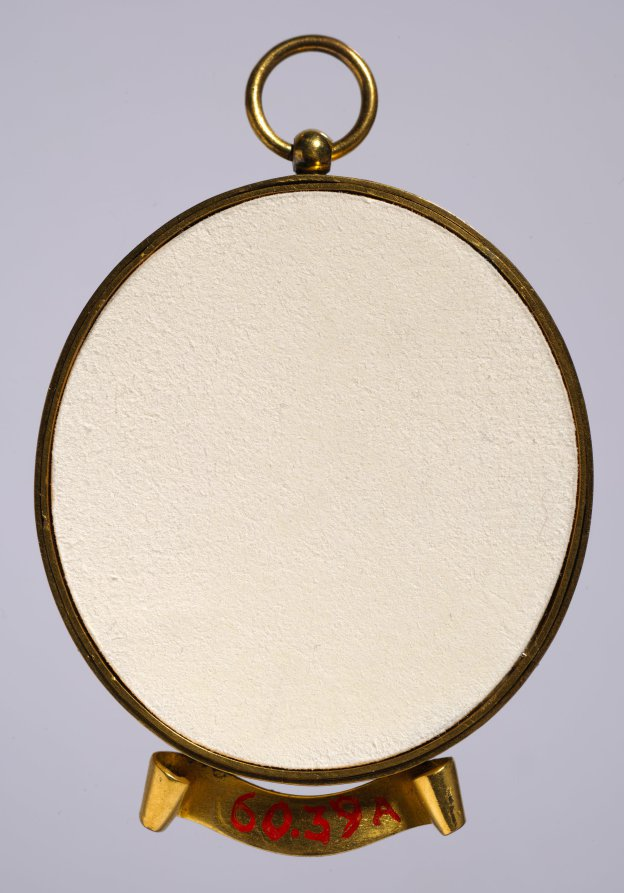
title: Portrait of Charles Howard, 2nd Baron Howard of Effingham, later 1st Earl of Nottingham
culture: England, 16th century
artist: Nicholas Hilliard (English, c. 1547–1619)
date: 1576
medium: watercolor on vellum in a gilt metal frame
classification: Portrait Miniature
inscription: inscribed from left: Ano, Dm. 1576: / AEtatis Suae; 39.